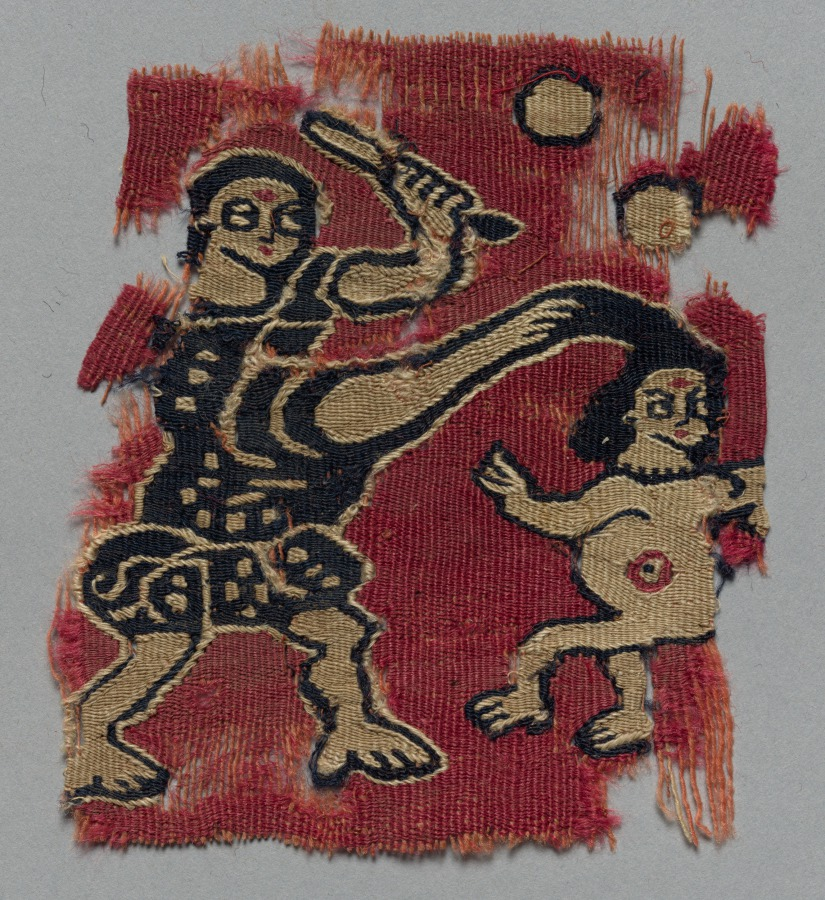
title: Fragment of an Ornament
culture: Egypt, Byzantine period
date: 700s - 800s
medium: tapestry weave: wool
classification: Textile